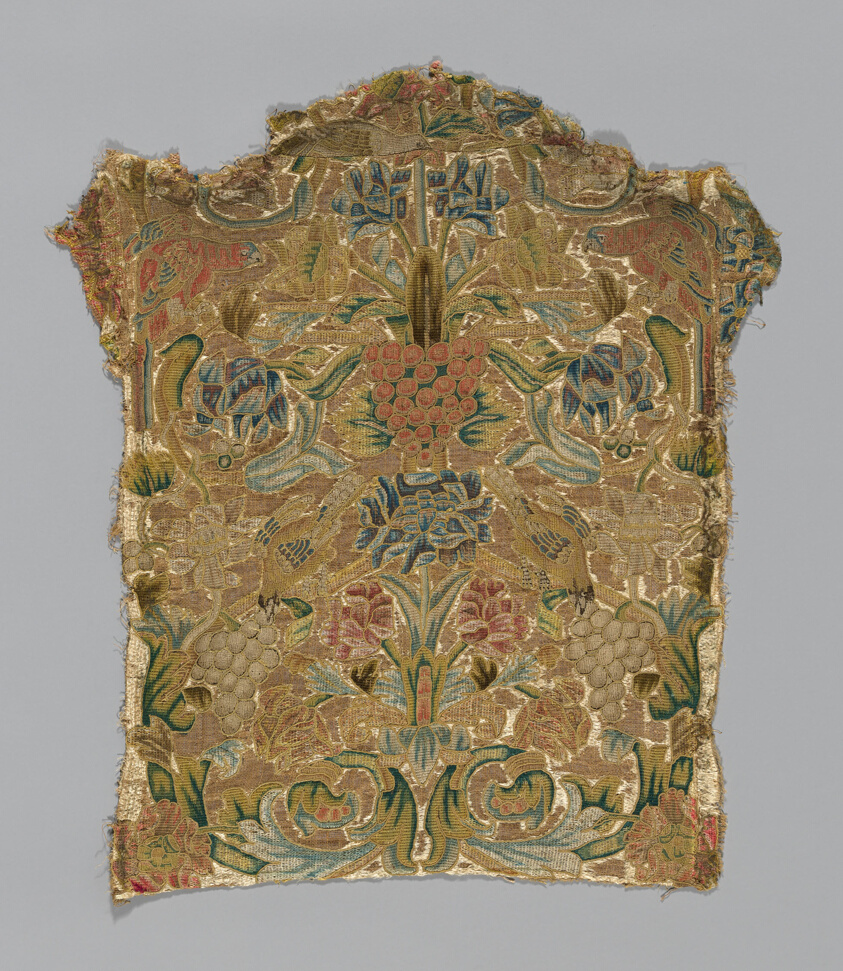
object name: Textile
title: Chair Back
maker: Italy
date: 17th century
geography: Italy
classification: textile; needlework (visual works)